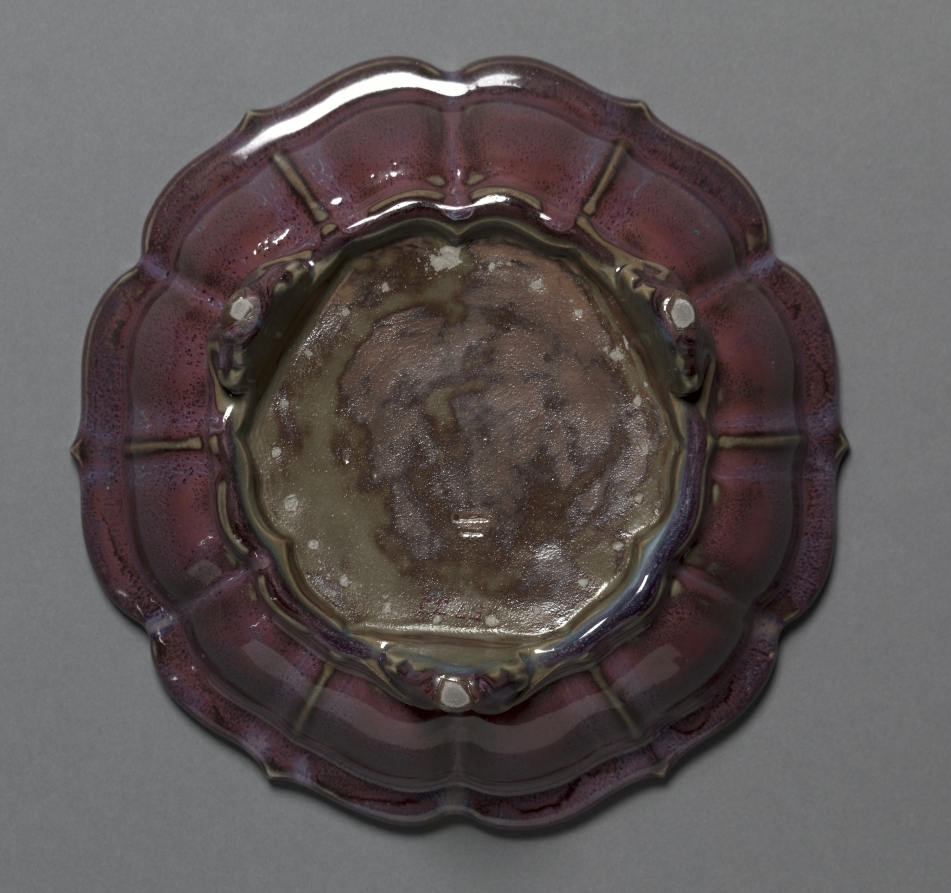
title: Bulb Bowl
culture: China, Henan Province, Yuxian, Juntai, Ming dynasty (1368–1644)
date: early 1400s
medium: porcelaneous stoneware, numbered Jun ware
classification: Ceramic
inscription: 二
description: Numbered Jun ware is inscribed with a number on its bottom—in this case number "two"—and is thought to have been made initially for the early Ming imperial court. The number indicates size, with "one" being the largest and "ten" being the smallest. Another characteristic is the "earthworm trail" left on the glaze surface, seen on the interior of this bulb bowl, where the opalescent blue glaze has cracked in several places during firing. The rich purplish tone on the exterior is the result of using copper pigment in the glaze.